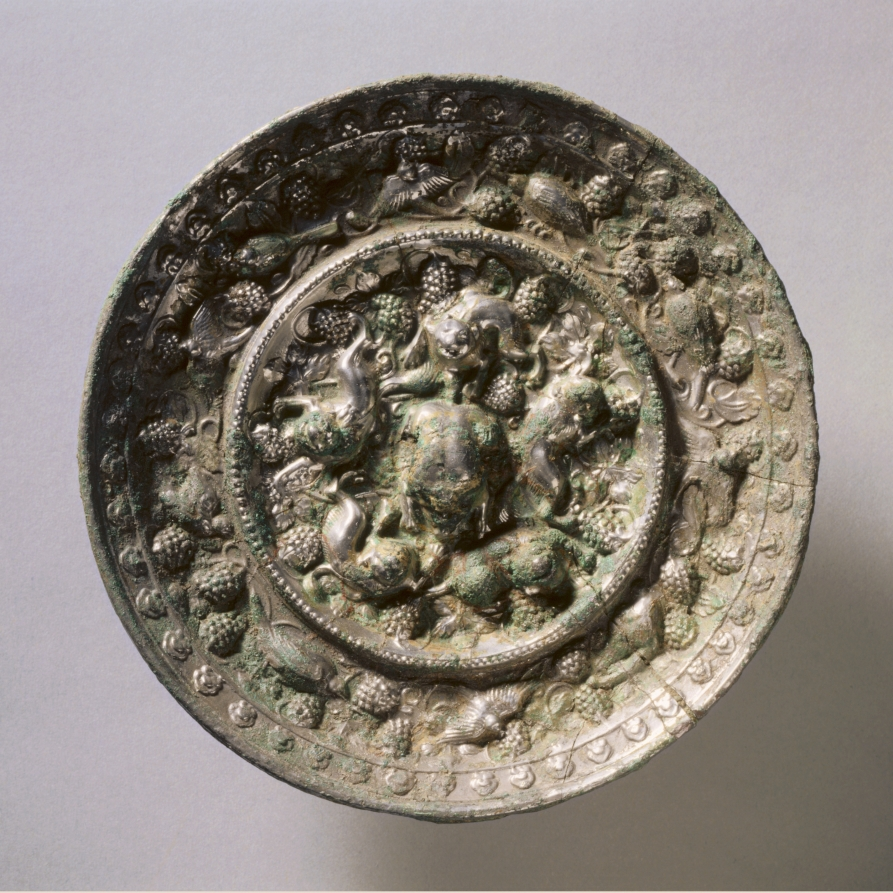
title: Animal-and-Grape Mirror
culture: China, Tang dynasty (618-907)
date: early 600s-early 900s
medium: bronze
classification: Metalwork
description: The mirror was cast using lost-wax technology. Little finishing work is evident on the back. Extensive cracking, typical of high tin mirrors is evident.